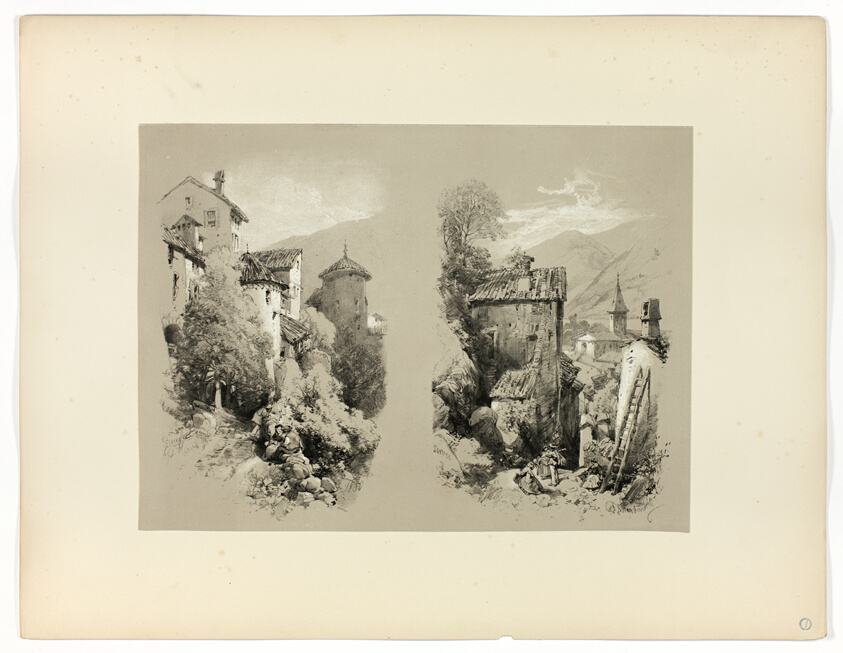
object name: Print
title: Beaufort and Serves, from Picturesque Selections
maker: James Duffield Harding, (English, 1798-1863); Published by W. Kent and Co.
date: 1860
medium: Lithograph on paper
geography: England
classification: lithograph; print; prints and drawing